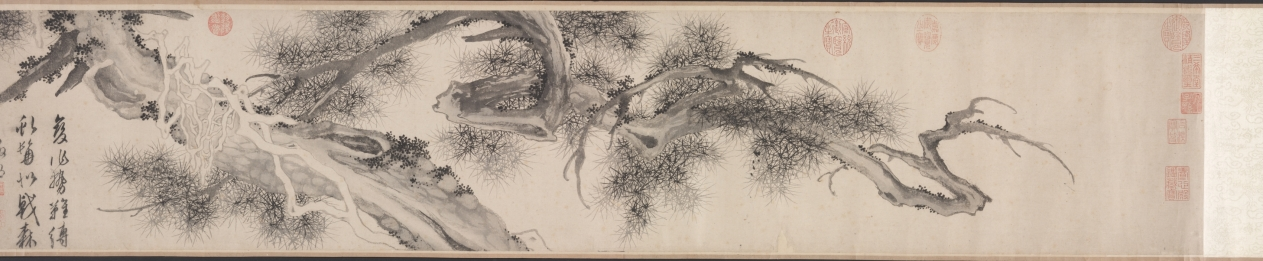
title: Old Pine Tree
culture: China, Ming dynasty (1368–1644)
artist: Wen Zhengming (Chinese, 1470–1559)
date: late 1530s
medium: handscroll; ink on paper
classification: Painting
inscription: 變化勢難縛，虬髯似戟森. 徵明 [印]文徵明印; 衡山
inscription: 2 partial seals of Qian Shisheng 錢士昇 (1575–1652)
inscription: 8 imperial seals: 6 of the Qianlong emperor (r. 1736–95); 1 of the Jiaqing emperor (r. 1796–1821); 1 of the Xuantong emperor (r. 1909–11).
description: Here the natural appearance of a gnarled and vine-entangled pine has been transformed into a rhythmic abstraction of brushstrokes and ink tonalities, with unifying opposites—opening and closing, rising and falling—that provide the design across the horizontal scroll. The artist's inscription reads: "The force of change beyond restraint; / The dragon's whiskers are likened to a forest of spears."